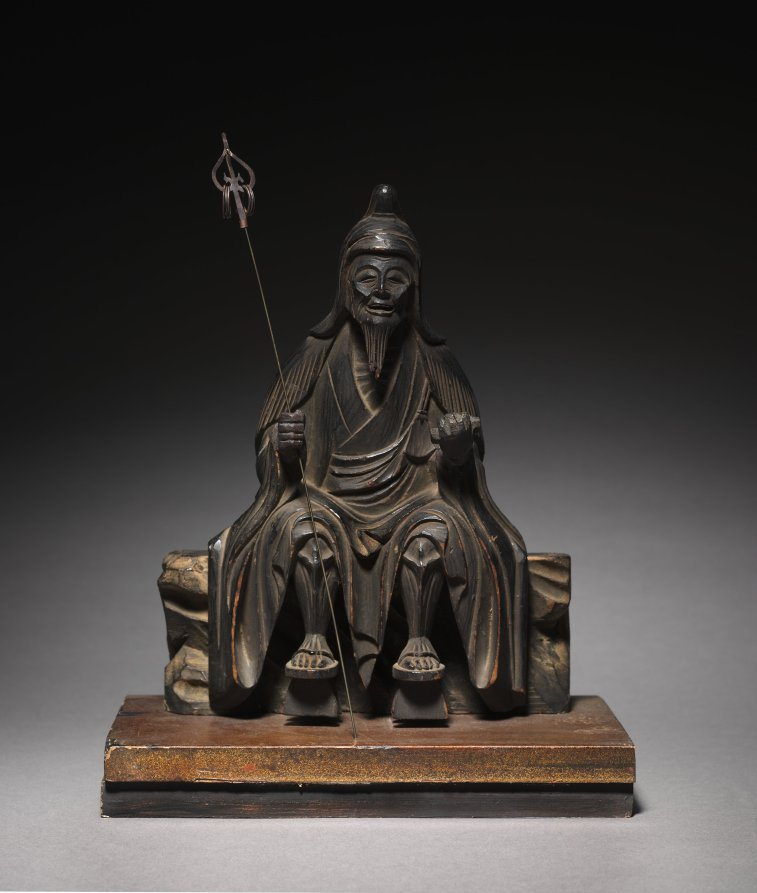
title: En no Gyōja with Zenki and Kōki (En no Gyōja)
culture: Japan, Edo period (1615–1868)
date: 1615–1868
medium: wood with paint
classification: Sculpture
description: This is one of a trio of figures identified as Enno Gyoja and his two attendants, Zenki and Kōki. The set follows the iconography of Shugendo, the traditional mountain ascetic practice in Japan. Enno Gyoja is depicted as a hermit-monk, seated on a rock attached to a modern base. He holds a staff in his right hand and a sutra in the left. The two attendants take the form of half-human, half-demonic figures and are regarded as a married couple.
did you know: These figures' miniaturized format allowed them to be portable devotional statuettes that worshipers could carry as they traveled.